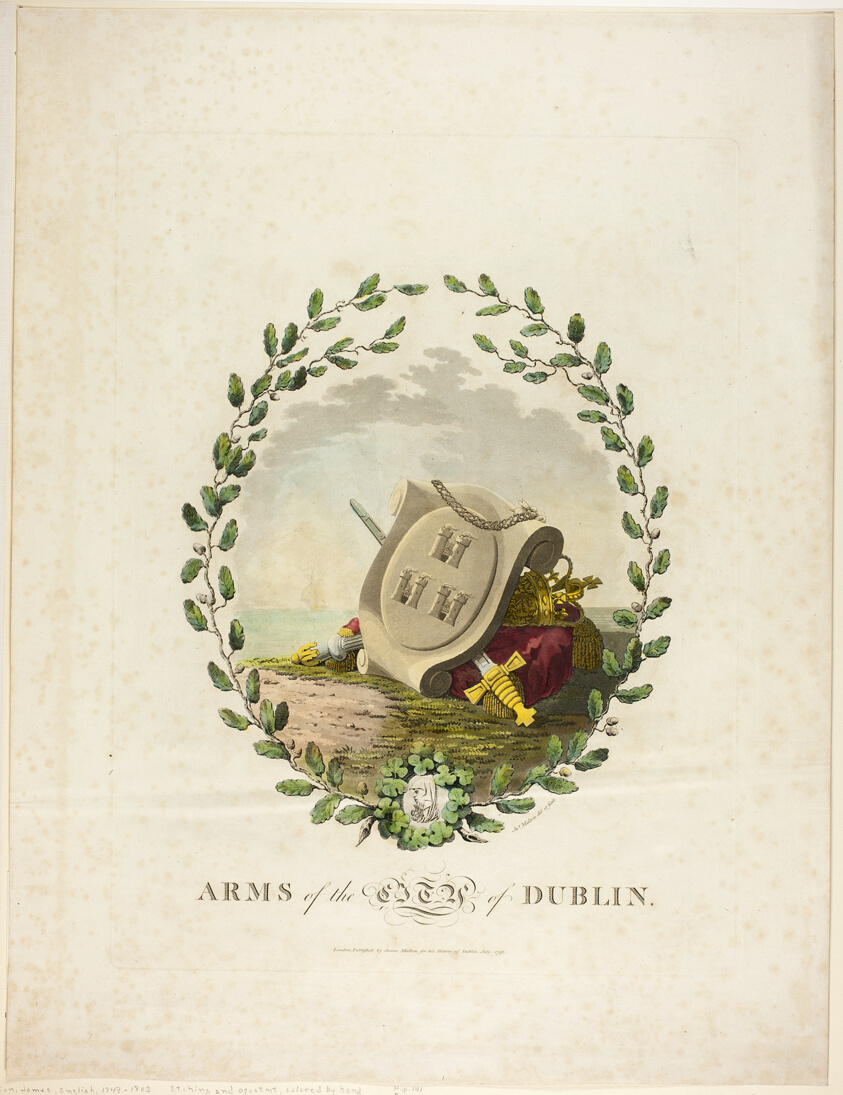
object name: Print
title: Dublin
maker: James Malton (English, 1761-1803)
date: published July 1792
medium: Hand-colored aquatint in black on ivory wove paper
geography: England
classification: aquatint; print; prints and drawing